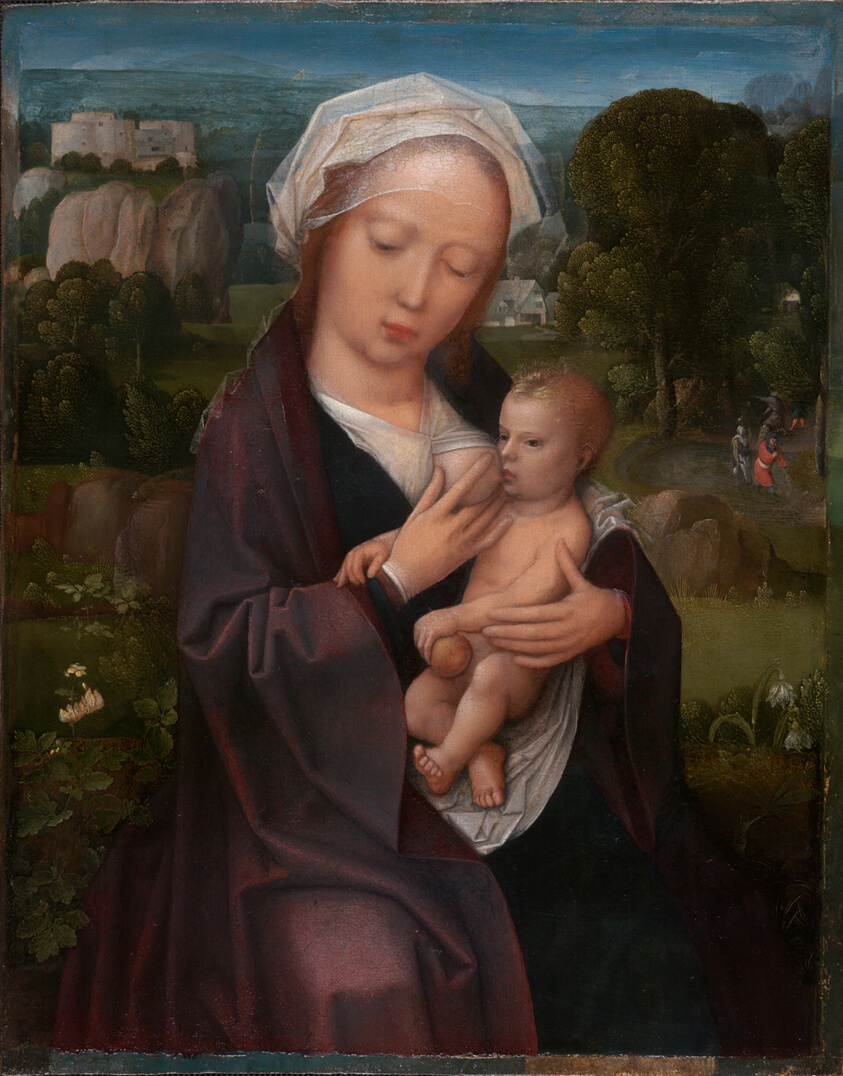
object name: Painting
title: Virgin and Child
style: 16th Century, sixteenth century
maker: Workshop of Adriaen Isenbrant (Netherlandish, c. 1485–1551)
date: c. 1520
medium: Oil on panel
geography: Belgium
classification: painting; dutch; oil on panel; oil paintings (visual works); paint; european painting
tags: Virgin and child/Madonna and child, buildings, building, pond, water, figures, men, foliage, trees, religion, religious scenes, religious figures, religious, Christianity, Christian subjects, landscape, woman with children, children, woman, Jesus, Virgin Mary, Century of Progress, world's fairs, Chicago World's Fairs